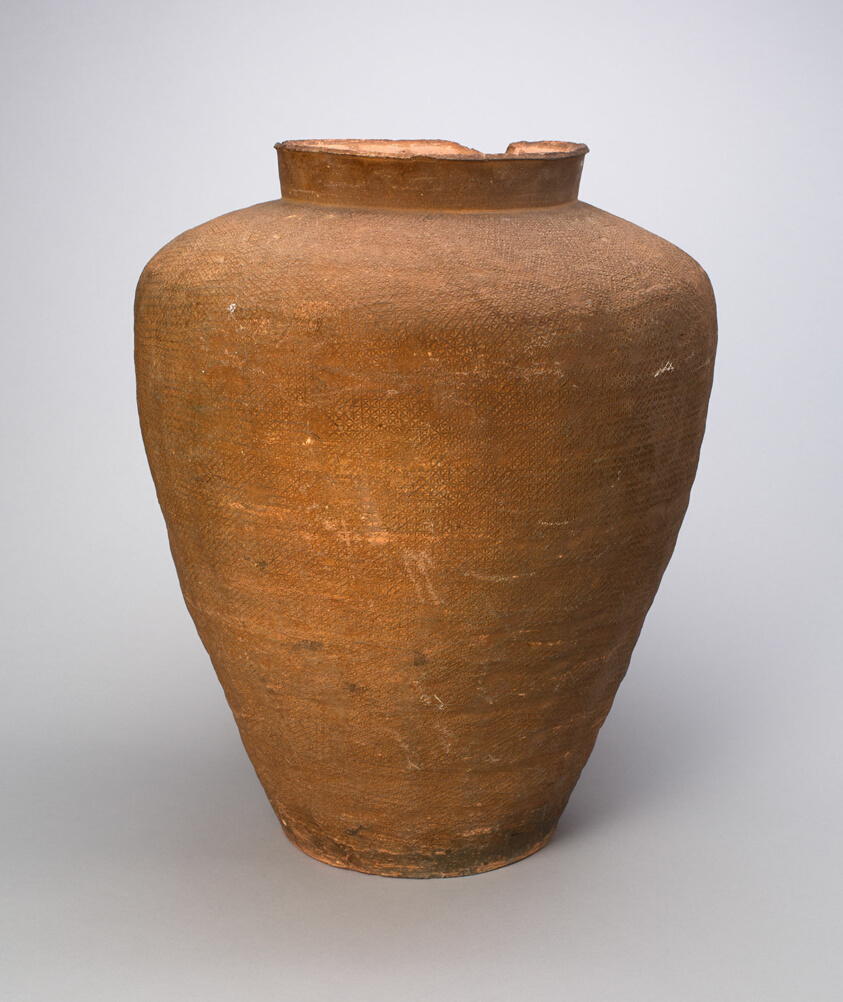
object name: Vessel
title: Jar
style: Chinese (culture or style)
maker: China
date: Eastern Zhou dynasty, Warring States period (480–221 B.C.), 4th/3rd century B.C.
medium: Stoneware with impressed decoration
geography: China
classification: ceramics; asian art; vessel